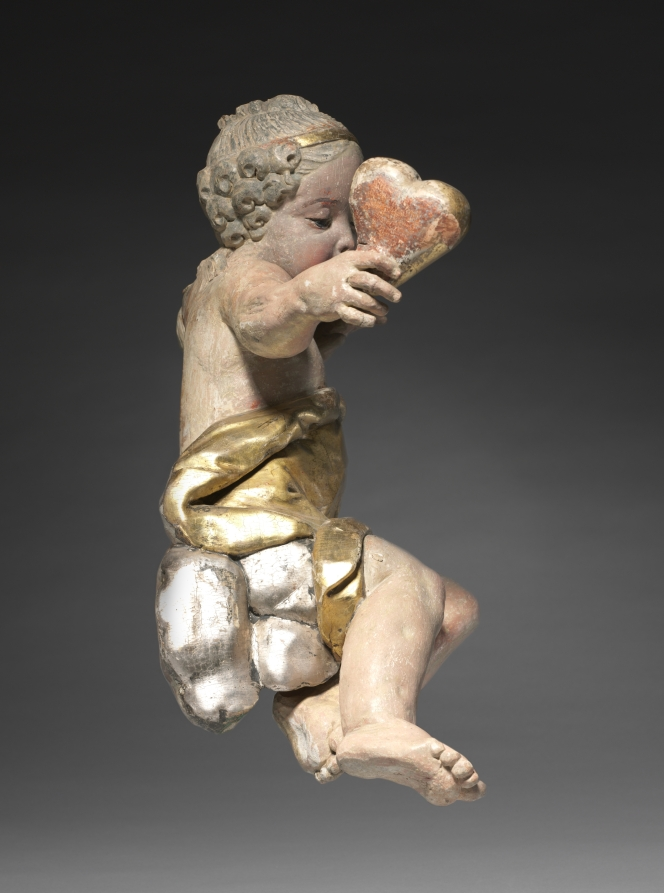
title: Putto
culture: Germany, near Bamberg, 18th century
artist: Ferdinand Tietz (Austrian, 1708–1777)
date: mid-1700s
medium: painted and gilded wood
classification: Sculpture